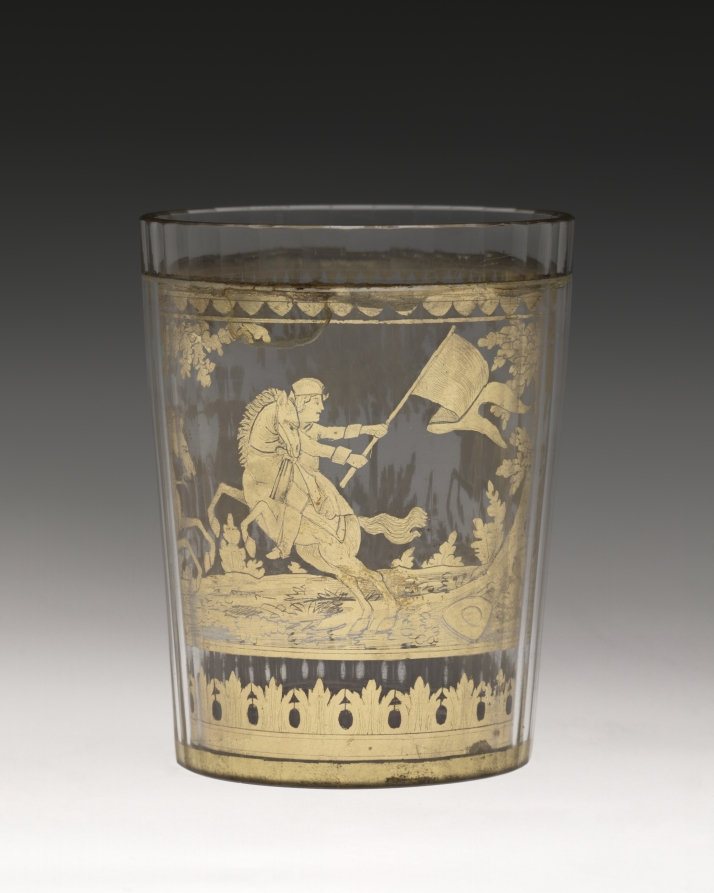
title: Tumbler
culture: Bohemia, 18th century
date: c. 1730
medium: zwischengoldglas (glass)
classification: Glass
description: Small beakers, or tumblers, were used to drink various types of spirits, cordials, and fortified wines, like sherry and port. “Gold between glass” (Zwischengoldglas) was a labor-intensive and costly technique practiced in Bohemia (present-day Czech Republic) and Austria in the 1700s. A gold-leaf design was affixed between two glass vessels that were then precisely fit together and fused. In this example, the gold leaf portrays a boisterous hunting scene. When the glass is tipped and emptied, the interior reveals that two hunting dogs have killed a hare.